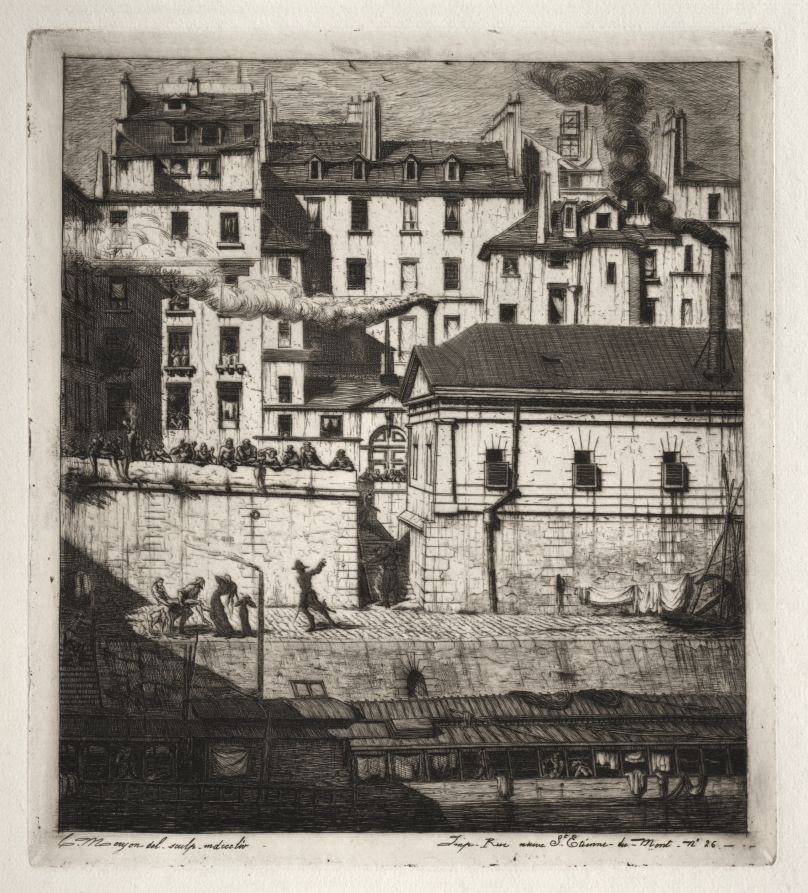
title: Etchings of Paris: The Mortuary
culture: France, 19th century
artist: Charles Meryon (French, 1821–1868)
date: 1854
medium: etching and drypoint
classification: Print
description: One of the greatest French etchers and an important figure in the mid-19th-century etching revival, Meryon devoted himself exclusively to drawing and printmaking by the age of 28. Continually experimenting to achieve the desired nuances of light and shadow, he developed his compositions through numerous states and printed on a variety of papers, favoring pale green for some of his most beautiful impressions. Meryon specialized in views of Paris, often recording older areas, like the morgue building dating from 1568, soon to disappear with the modernization of the city.